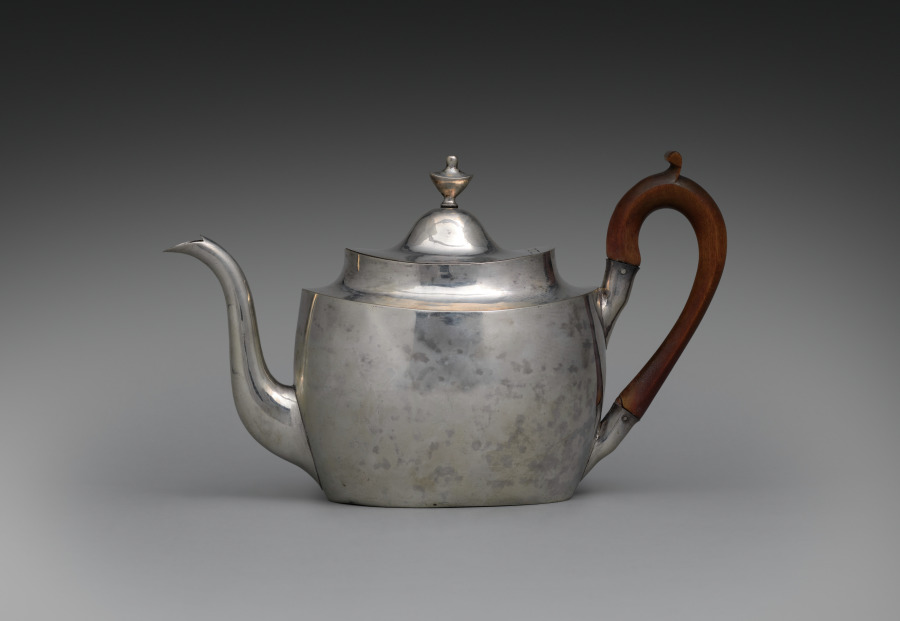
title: Teapot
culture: America, early 19th Century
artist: firm of Henry Farnam (American, 1773–1833)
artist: firm of Rufus Farnam (American, 1771-)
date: c. 1800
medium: silver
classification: Silver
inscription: engraved "AW/to/AW" in bright-cut script on side.